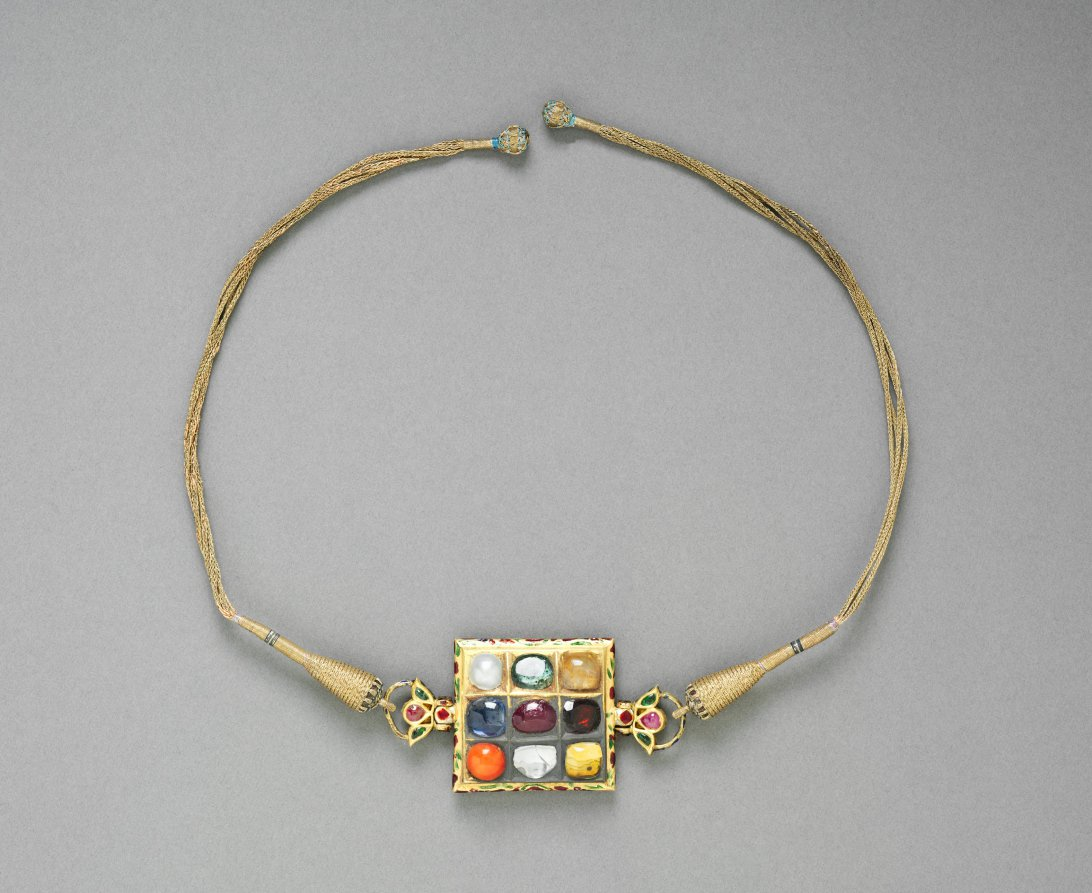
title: Wristlet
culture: India, Punjab (?)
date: 18th Century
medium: silver gilt with semiprecious stones and enamel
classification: Jewelry